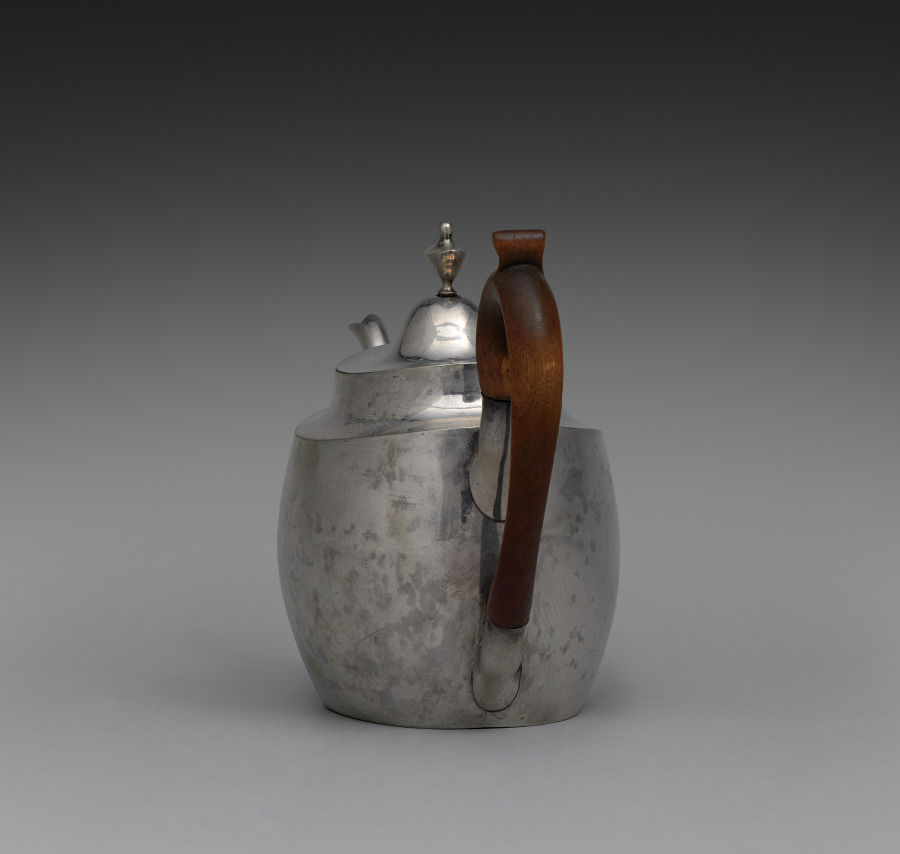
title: Teapot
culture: America, early 19th Century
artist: firm of Henry Farnam (American, 1773–1833)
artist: firm of Rufus Farnam (American, 1771-)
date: c. 1800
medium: silver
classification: Silver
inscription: engraved "AW/to/AW" in bright-cut script on side.